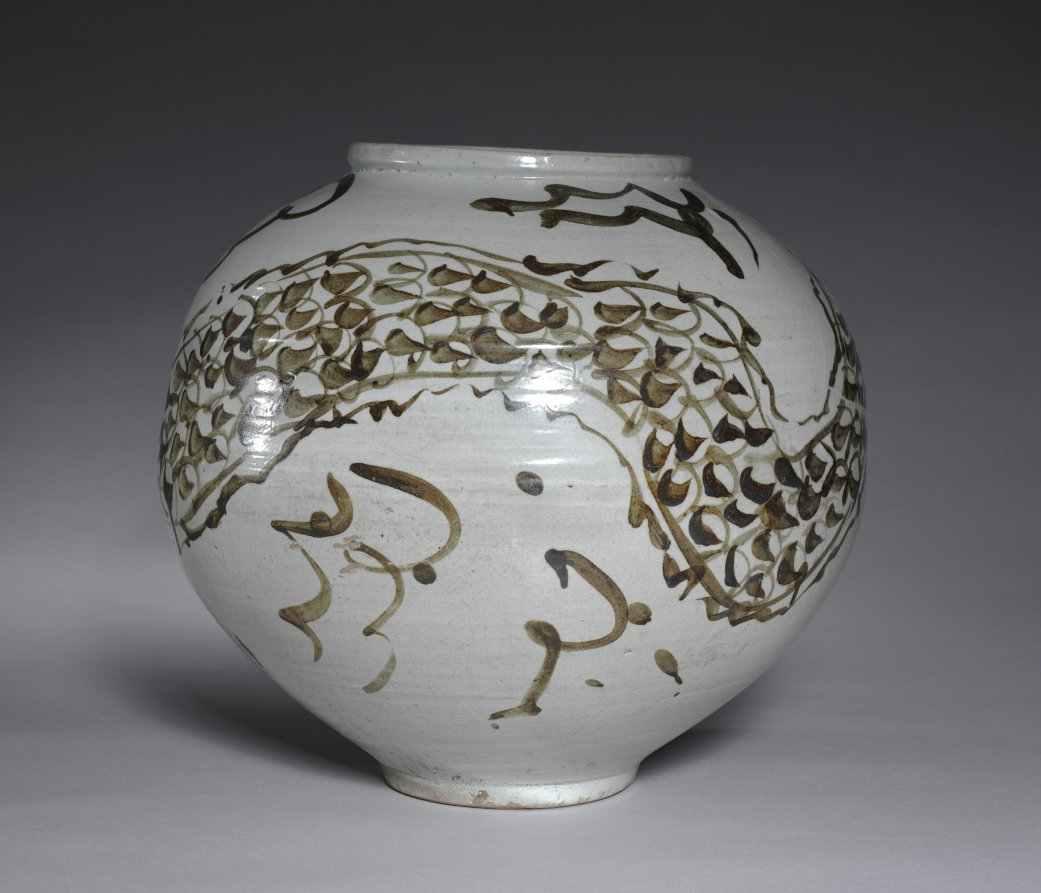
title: Jar with Dragon and Clouds Design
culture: Korea, Joseon dynasty (1392–1910)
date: late 1600s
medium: porcelain with underglaze iron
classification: Ceramic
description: In traditional Korean art, dragons were used as an emblem of royalty. Over centuries, the ways of depicting this powerful mythical creature varied in response to artistic trends and socioeconomic changes. Here, the artist imagined with free-flowing calligraphic brushstrokes a whimsical dragon with bulging eyes who wraps his scaled body around the vessel. This piece was acquired from the London Gallery in Tokyo, Japan. Its owner, Tajima Mitsuru (born about 1936) is regarded as one of the pioneering Japanese art dealers to cultivate lasting relationships directly with collectors and museums in the United States.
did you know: A mythical creature believed to have the power to make rain, the dragon is a prominent symbol of rulers in premodern East Asia; the image of dragons was used exclusively for the king's paraphernalia.